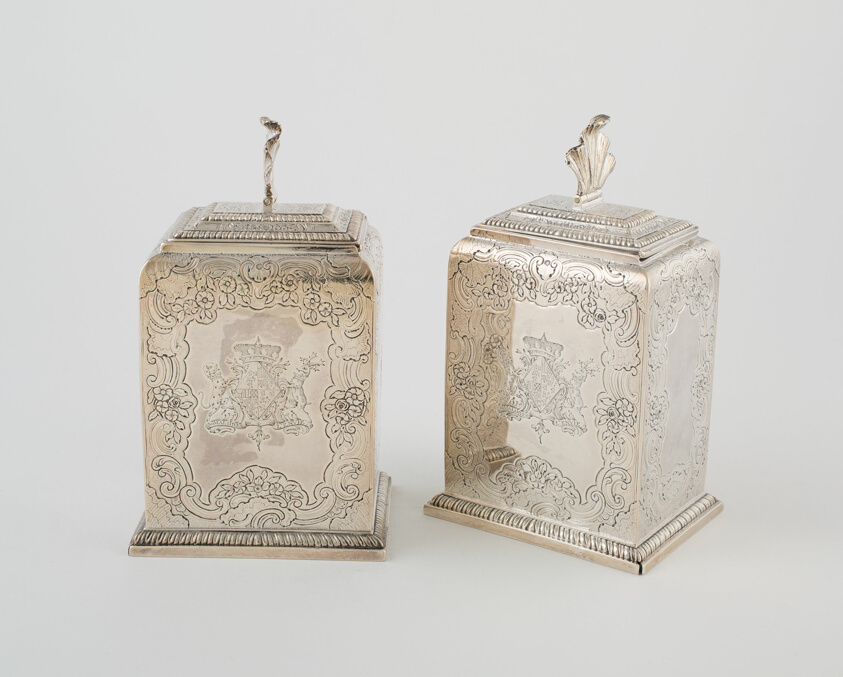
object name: Metalwork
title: Pair of Tea Caddies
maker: Eliza Godfrey; English, active 1731-58; London, England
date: 1744/45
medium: Sterling silver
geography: London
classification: teaware; silver; metalwork; european decorative arts